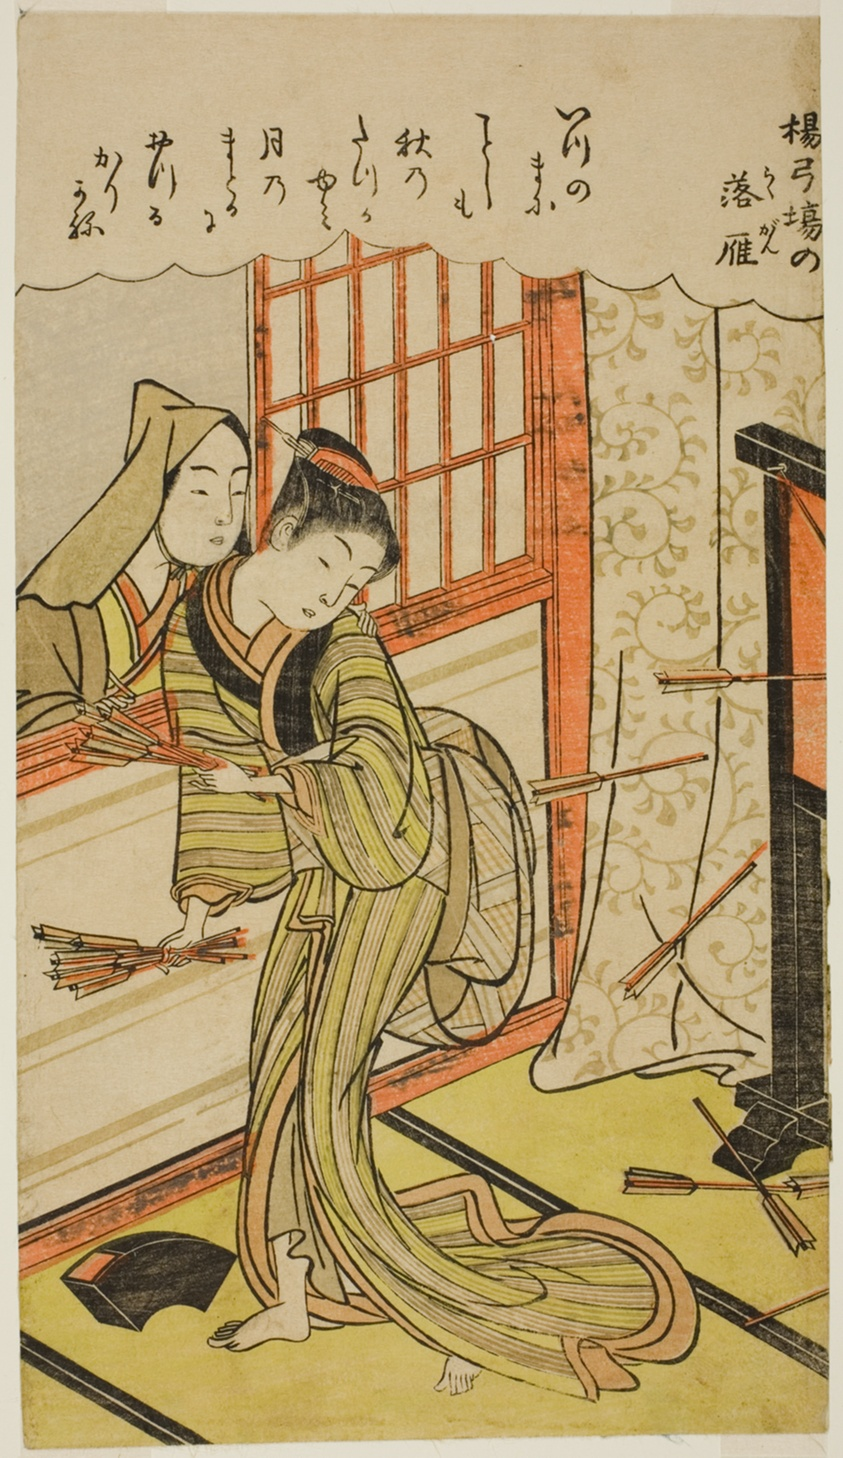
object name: Print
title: Descending Geese in the Archery Gallery (Yokyuba no Rakugan)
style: Japanese (culture or style)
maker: Attributed to Kitao Shigemasa; Japanese, 1739-1820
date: c. 1770s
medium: Color woodblock print; hosoban, trimmed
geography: Japan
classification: woodblock print; print; asian art